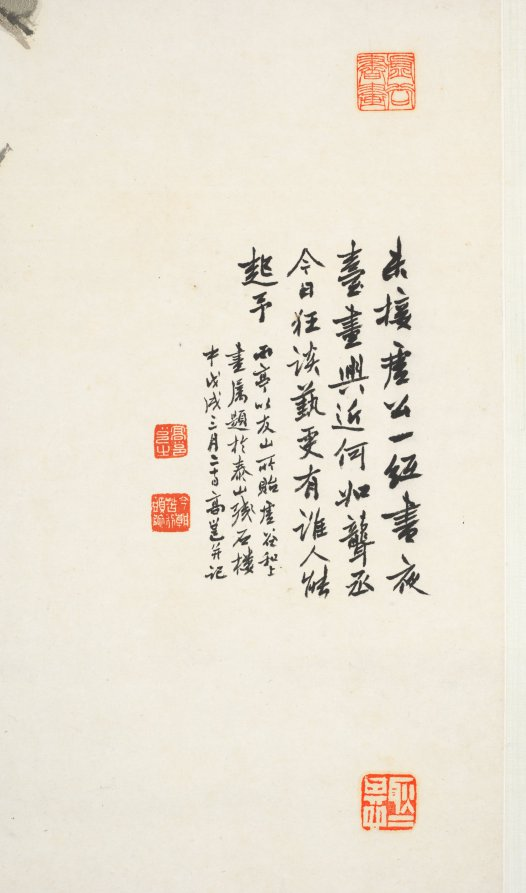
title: Pipa (Loquats)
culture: China, Yangzhou, Qing dynasty (1644-1911)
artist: Xugu (Chinese, 1823–1896)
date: c. 1888–89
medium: Hanging scroll; ink and color on paper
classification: Painting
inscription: 友山仁兄大人屬即教之，虛谷. [印]虛谷書畫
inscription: 未接虛公一經書2，夜臺畫興近何如。/ 聾丞今日狂談藝，更有誰人能起予。 雨亭以友山所貽虛谷和上畫屬，题於泰山殘石樓中，戊戌三日二十日，高邕并記。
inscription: 虚谷上人，余未見其人。觀高聾題大氏，亦海上高流也。其畫下筆如風，隨意涂抹，皆成逸趣。此幀畫枇杷纍纍如缀金，坐其下若咽洞庭五月涼也！ 雨亭君所藏，今以貽頌周先生。清道人題。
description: The loquat is a plant native to China that produces a juicy, yellow fruit in early summer. The artist may have intentionally extended the branches beyond the paper to emphasize the abundance of fruit. Xugu’s subjects of flowers, goldfish, and loquats express wishes for abundance and wealth, and must have appealed to his patrons. Xugu gave up his career as a military official during the Taiping rebellion (1850–64) and became an itinerant monk who painted for a living. He spent the later years of his life in Shanghai and his fame as an artist is associated with that city.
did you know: Xugu inscribed his painting on the right, dedicating it to a Mr. Youshan. Two additional inscriptions by other writers were added later, each time the painting changed owners.